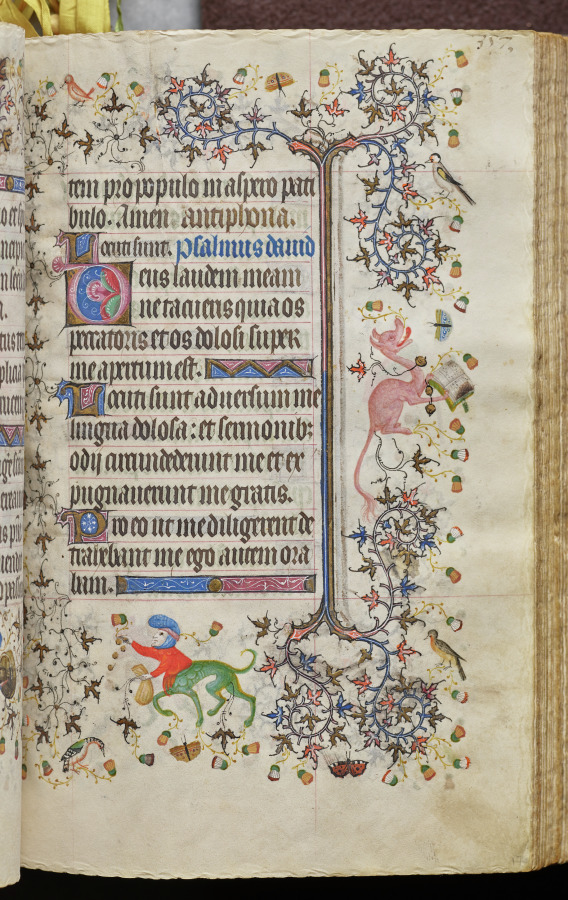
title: Hours of Charles the Noble, King of Navarre (1361-1425): fol. 174r, Text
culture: France, Paris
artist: Master of the Brussels Initials and Associates (French)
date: c. 1405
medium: ink, tempera, and gold on vellum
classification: Bound Volume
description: This precious volume was obviously highly prized by its owner, the French-born King of Navarre, who had his coat of arms painted on no less than twenty folios. Rather than directly commissioning this manuscript from a specific workshop, it seems that Charles the Noble acquired his book of hours -- perhaps ready-made for the luxury market -- while on a trip to Paris in 1404-05. A collaborative effort, six painting styles are evidenced within the pages of this codex, those of two Italians, two Frenchmen, and two Netherlanders. The painter who was responsible for the planning and decoration of the book, and who produced seventeen of the large miniatures, was a Bolognese artist known as the Master of the Brussels Initials. His principal assistant, responsible for most of the borders, was a Florentine who signed his name "Zecho" da Firenze on folio 208 verso.